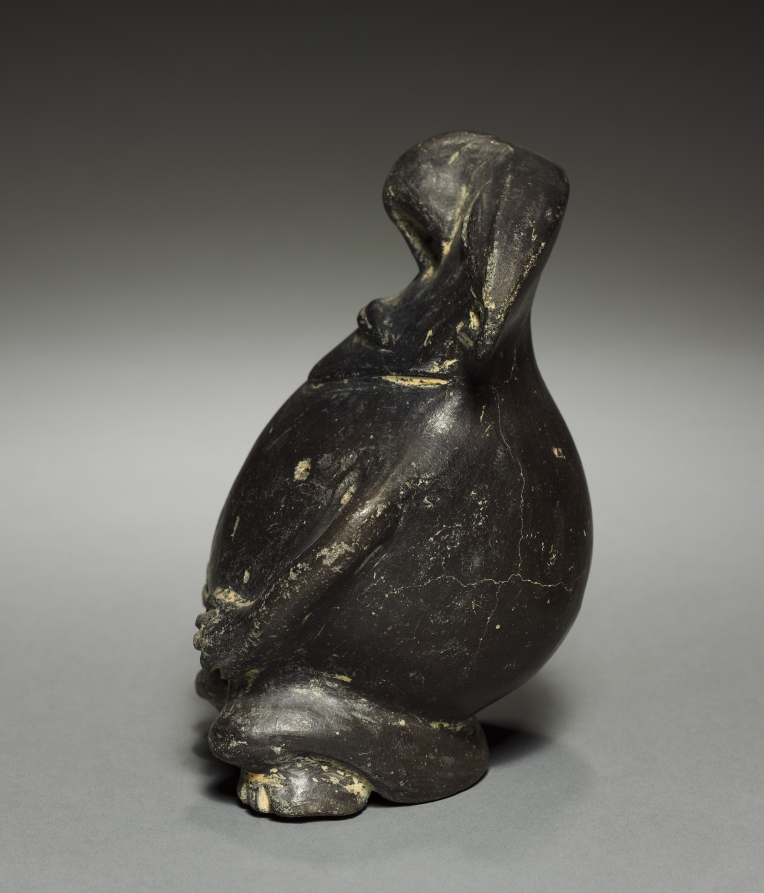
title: Figurine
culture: Colombia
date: before 1921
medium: pottery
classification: Ceramic